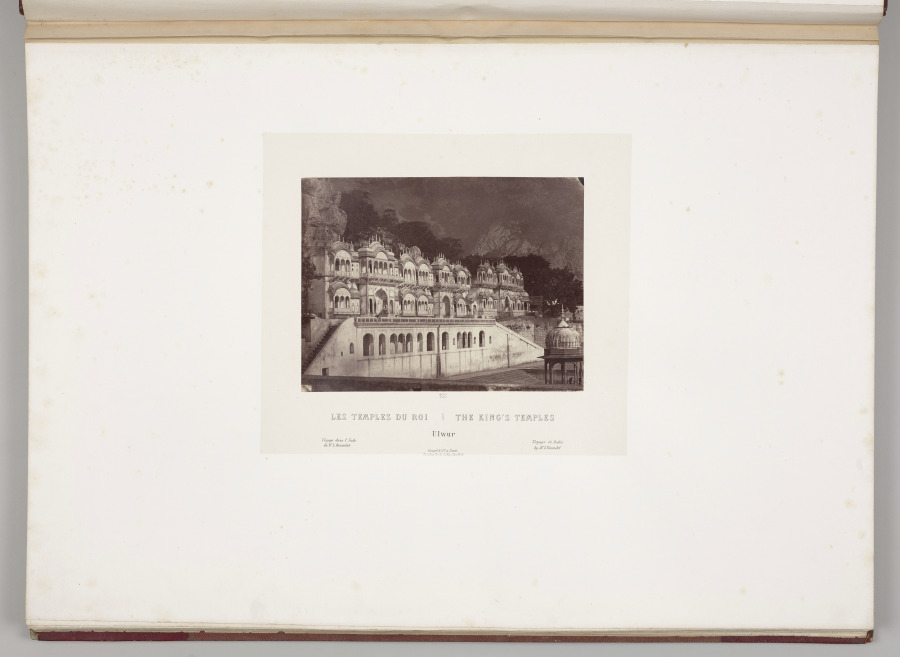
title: The King's Temples, Ulwur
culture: France, 19th century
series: India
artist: Louis-Théophile Marie Rousselet (French, 1845–1929)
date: 1865–68, published 1869–70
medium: Albumen print from glass plate negative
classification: Photograph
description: Concerned that his drawings did not do justice to the splendor of India’s monuments, Rousselet learned photography in India that year, a remarkable accomplishment. He proved to be a talented photographer with a sophisticated sense of composition. The scenes in this volume sweep across sites of Sultanate, Rajput, and Mughal power in northern India, from the sacred Hindu city of Varanasi on the Ganges River to Alwar in Rajasthan. Also included are several scenes of industry and portraits of Indian rulers.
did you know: Louis Rousselet described himself as a “scientific traveler” when he went to India alone at age 18 in 1863 and stayed into 1868.